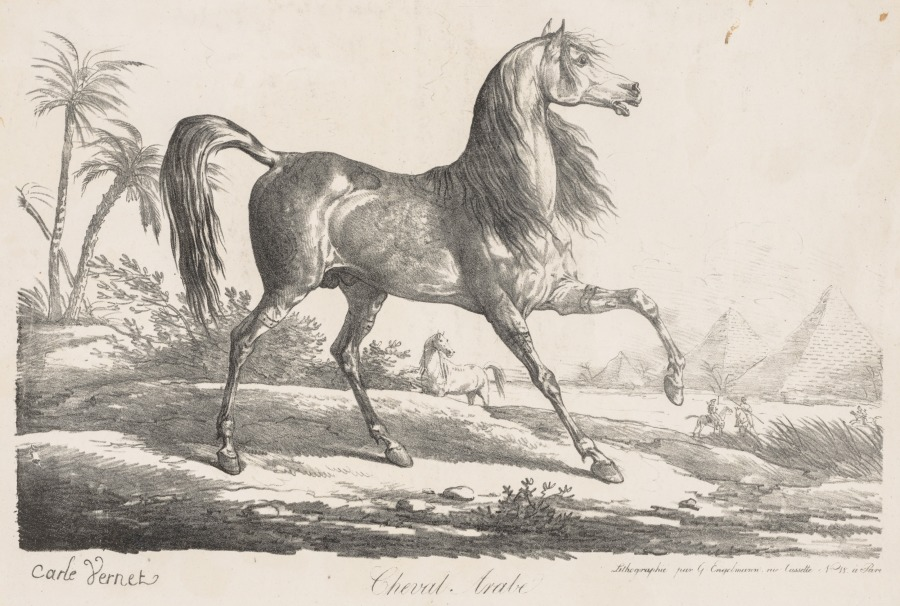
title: Suite de Chevaux: Cheval Arabe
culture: France, 18th-19th century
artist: Carle Vernet (French, 1758–1836)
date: c. 1780–1836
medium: lithograph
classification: Print